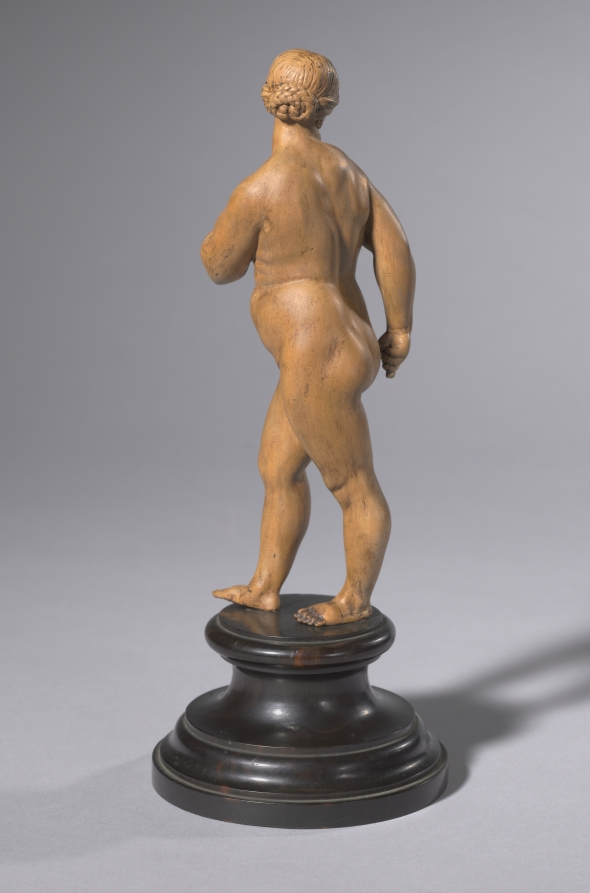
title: Eve Expelled from Paradise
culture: Germany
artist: Leonhard Kern (German, 1588–1662)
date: c. 1640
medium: wood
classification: Sculpture